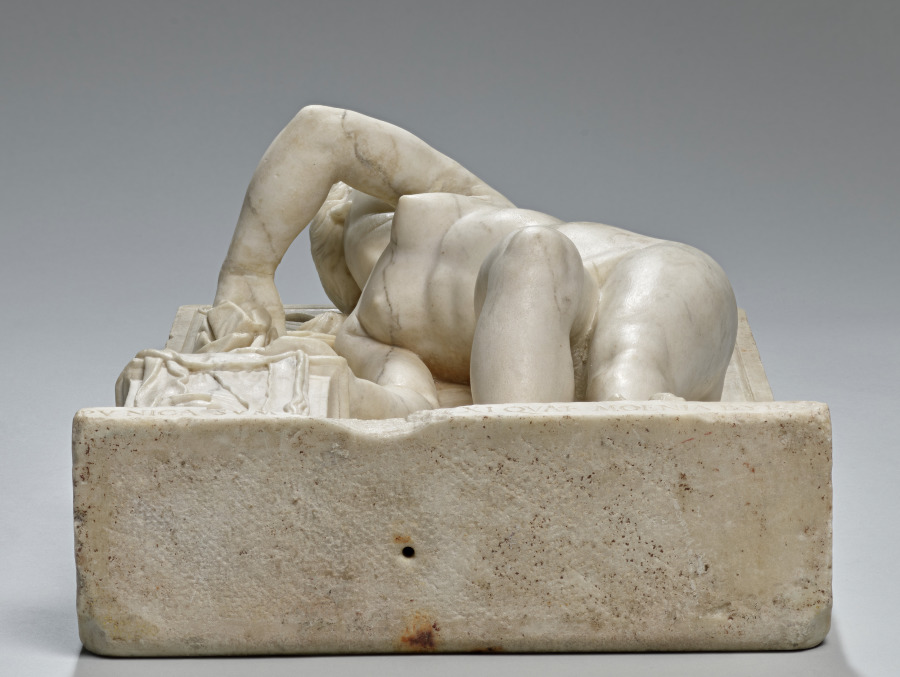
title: Dido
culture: Italy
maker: Aurelio Lombardo (Italian, 1501–1563)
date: c. 1525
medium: marble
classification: Sculpture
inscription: PVNICA SVM [DIDO ERE]XI QVAE MOENIA BYRSA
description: Artists customarily portrayed Dido as a forlorn lover abandoned by the Trojan hero, Aeneas, but here she is a conquering queen. Dido draws aside an oxhide curtain, a reference to the mythical founding of Carthage (in modern-day Tunisia, North Africa), when she was given an oxhide to demarcate granted land. By cutting it into thin strips she was able to encircle the future city. Dido was likely created for display in a studiolo, a place of study featuring refined works of art appreciated by humanist scholars and aficionados during the Renaissance.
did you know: Dido’s nudity and hairstyle are allusions to ancient Greek images of Aphrodite.